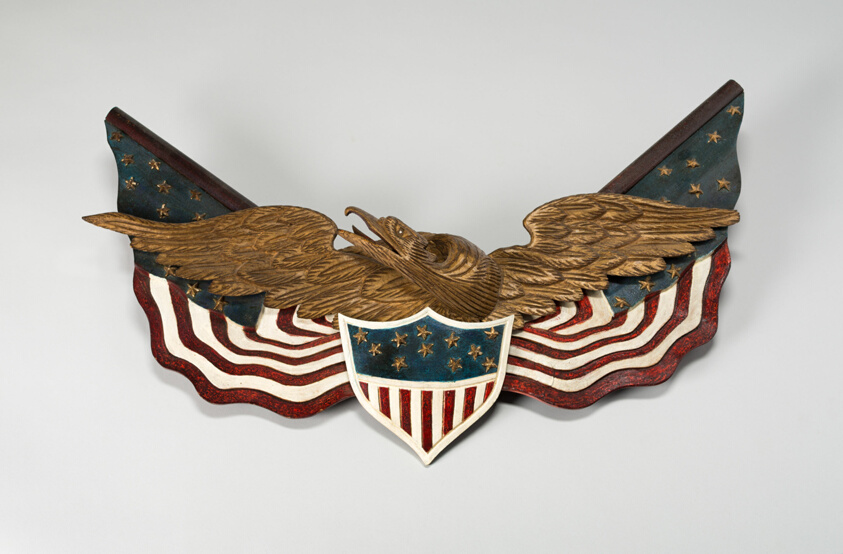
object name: Decorative Arts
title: Eagle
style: Folk Art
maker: John Haley Bellamy (American, 1836–1914)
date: c. 1890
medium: White pine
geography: Kittery Point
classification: sculpture; american decorative arts; american arts; decorative arts